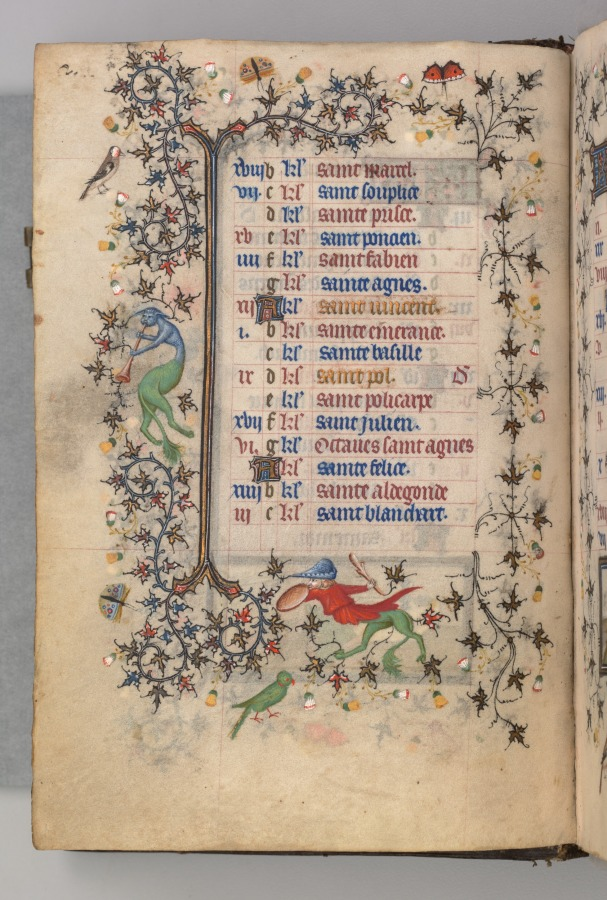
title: Hours of Charles the Noble, King of Navarre (1361-1425): fol. 1v, January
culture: France, Paris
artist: Master of the Brussels Initials and Associates (French)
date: c. 1405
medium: ink, tempera, and gold on vellum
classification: Bound Volume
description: This precious book was highly prized by its owner, Charles III, King of Navarre, a French-born prince whose coat of arms is painted on 20 folios. Charles visited Paris on numerous occasions and likely acquired this volume there in 1404. Paris was the center of the European book trade at the time and attracted illuminators from many parts of Europe. This manuscript represents one of the most remarkable fusions of French and Italian taste in book illumination. Though conforming to Parisian standards, most of the book’s major miniatures are the work of the Brussels Initials Master, an Italian illuminator who previously worked in Bologna and Padua.